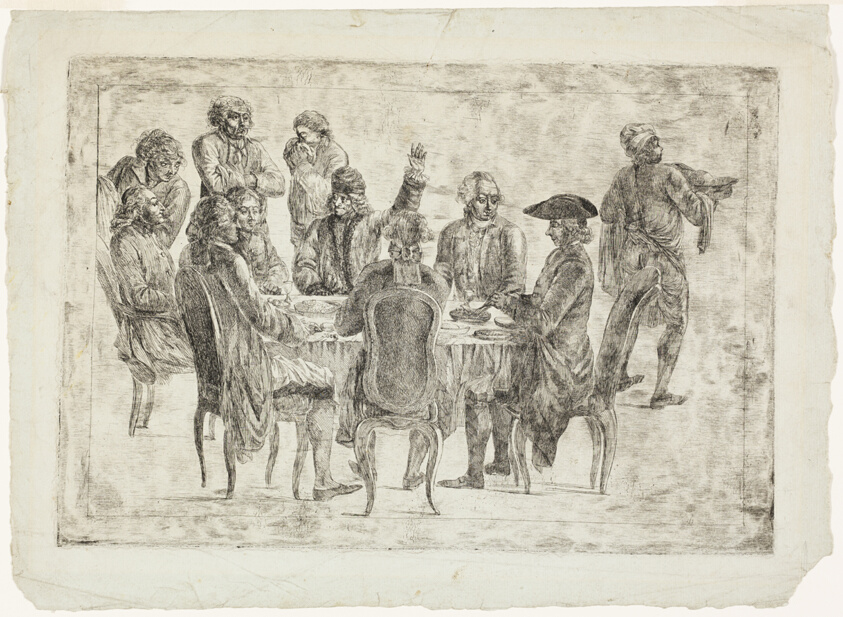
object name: Print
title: Le Déjeuner de Voltaire à Ferney or Le Souper des Philosophes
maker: Unknown Artist; after Jean Huber (Swiss, 1721-1786)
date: c. 1773–75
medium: Etching in black on bluish gray laid paper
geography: Switzerland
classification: etching; paper; print; prints and drawing